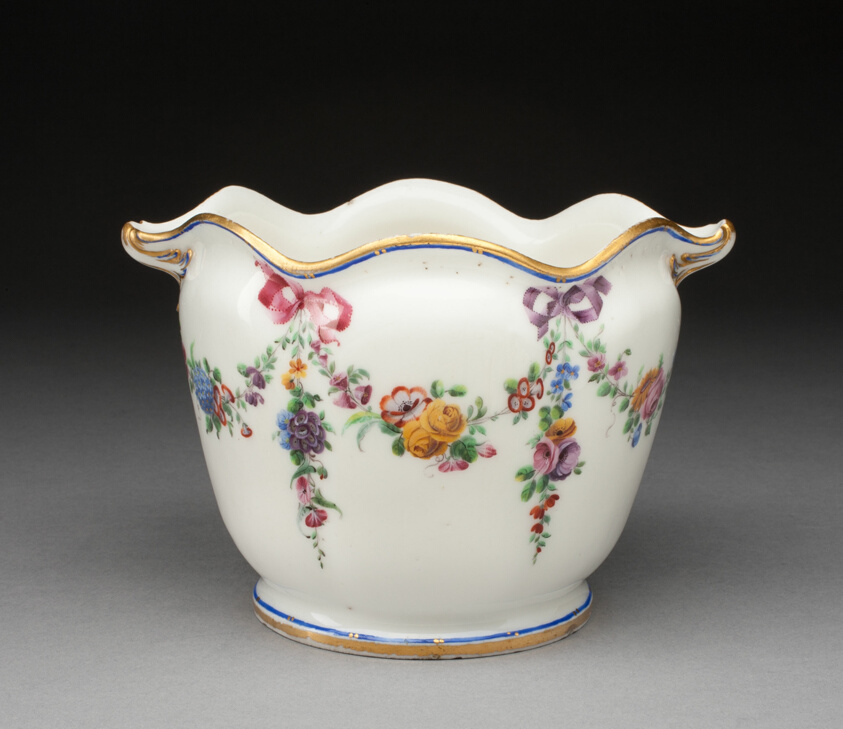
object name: Ceramics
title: Wineglass Cooler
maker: Sèvres Porcelain Manufactory; French, founded 1740; Painted by Antoine-Toussaint Cornailles; French, active 1755-1800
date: 1758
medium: Soft-paste porcelain, polychrome enamels, and gilding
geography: Sèvres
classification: ceramics; tableware; porcelain; european decorative arts